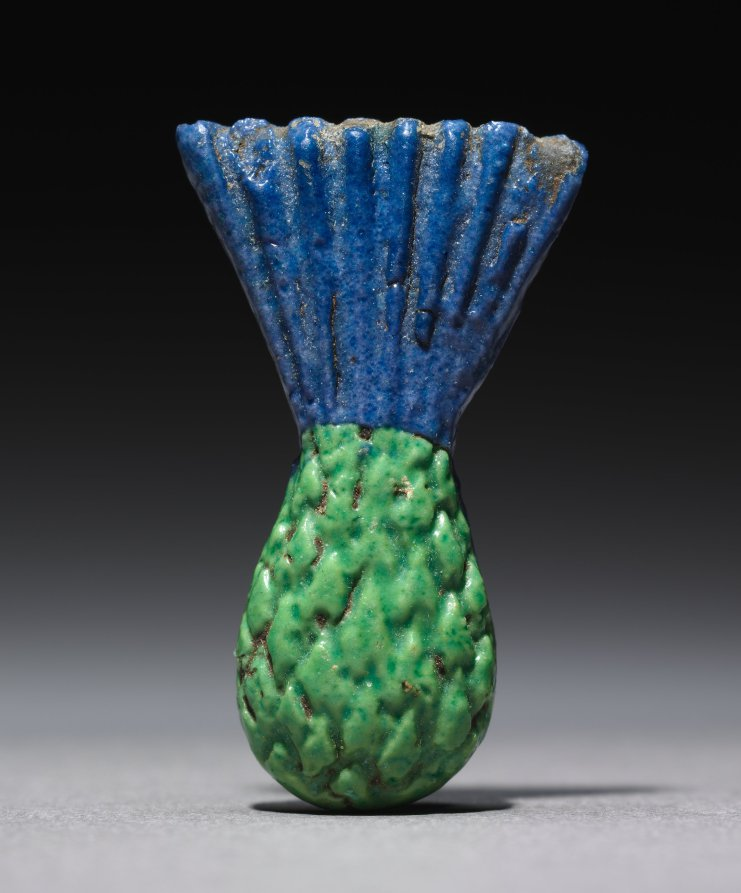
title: Cornflower Inlay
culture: Egypt, New Kingdom (1540–1069 BCE), Dynasty 18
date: 1350–1296 BCE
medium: polychrome faience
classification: Amulets